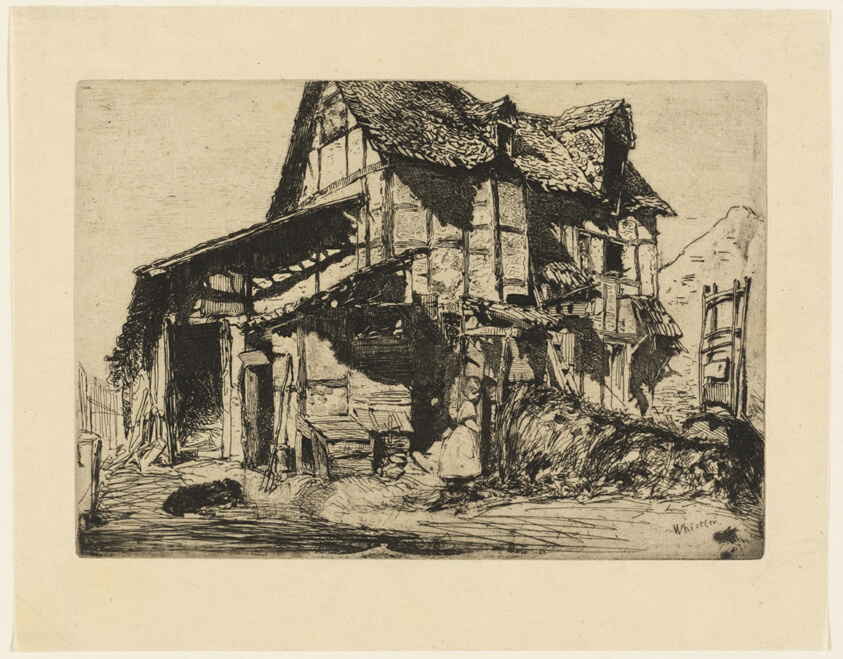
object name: Print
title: The Unsafe Tenement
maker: James McNeill Whistler (American, 1834-1903)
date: 1858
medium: Etching with foul biting in black ink on cream Japanese paper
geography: United States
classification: etching; foul biting; print; prints and drawing; paper